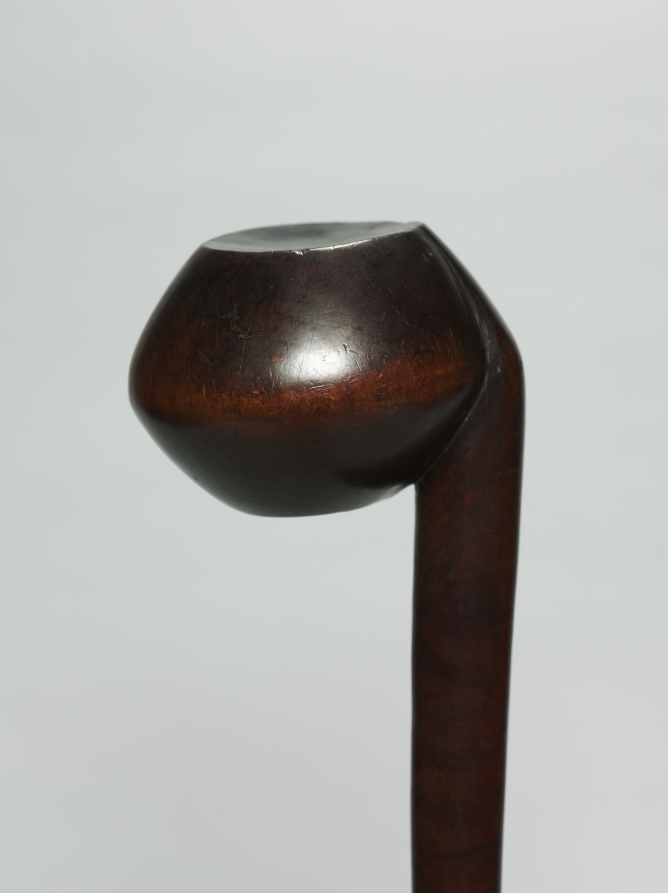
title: Club (Knobkerrie)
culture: Southern Africa, South Africa, Northern Ngun-style or Zulu-style maker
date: late 1800s or early 1900s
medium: Wood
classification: Arms and Armor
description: Relatively short sticks historically used for hunting and fighting are customarily called knobkerries. A combination of Afrikaans and Shona words, the name refers to the characteristic spherical knob of wood (knop) or head atop a cylindrical shaft (kirri). The knobs on these were carved into a tight whorl and a compressed sphere with a central rib. Even though their basic shapes were derived from real weapons, many of these precious objects were rarely if ever used as such. Highly personal, they instead functioned as ceremonial display items or regalia, symbolizing the masculinity and prowess of their owner.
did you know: The term knobkerrie refers to a characteristic spherical knob of wood or head atop a cylindrical shaft.